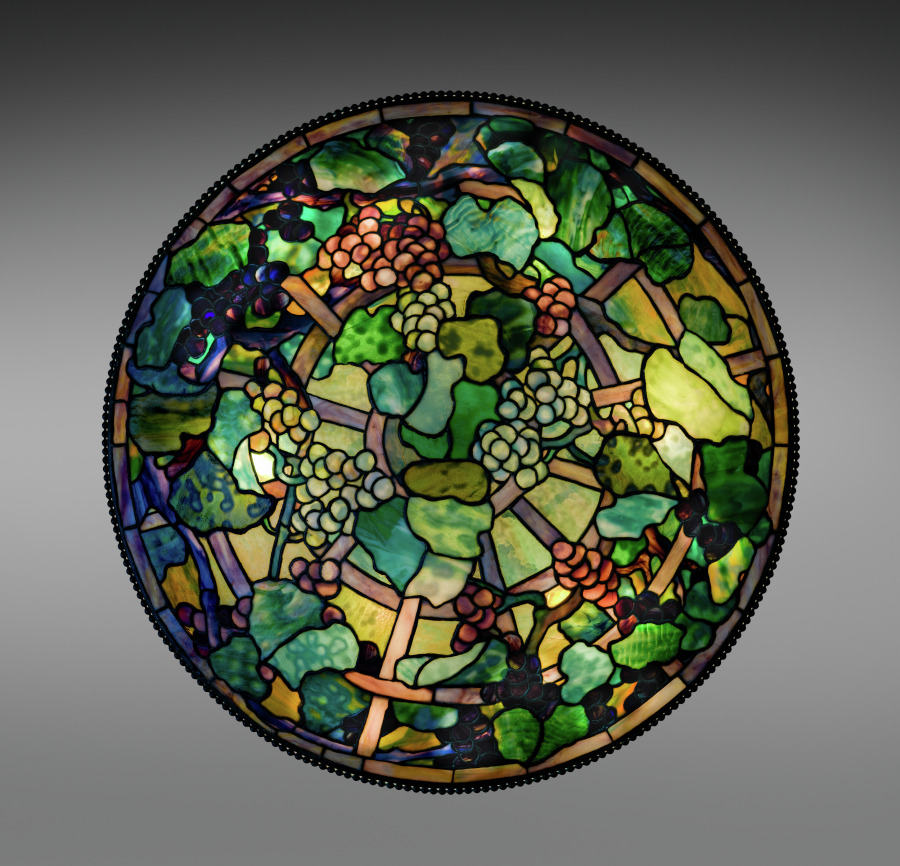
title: Grape Trellis Hanging Shade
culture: America, New York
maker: Tiffany Studios (United States, New York, 1902–32)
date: c. 1905–10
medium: Leaded glass, bronze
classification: Glass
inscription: TIFFANY STUDIOS/NEW YORK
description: In the 1870s a renewed emphasis on natural landscapes ushered in a generation of cottage gardeners who delighted in planting perennials in large quantities. Louis Comfort Tiffany was among those who championed the lush, sometimes wild-looking displays of varied floral species in the garden at his Long Island estate, Laurelton Hall. Tiffany encouraged his designers to take inspiration from his garden by shipping fresh cuttings almost weekly to his studios. Ohio native Clara Wolcott Driscoll and her team of female designers created floral patterns for lamps and mosaics based on the colorful blooms of spring that became among the most sought after and commercially successful of Tiffany’s production.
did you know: This pendant fixture was designed to be hung close to the ceiling to simulate a grape arbor.